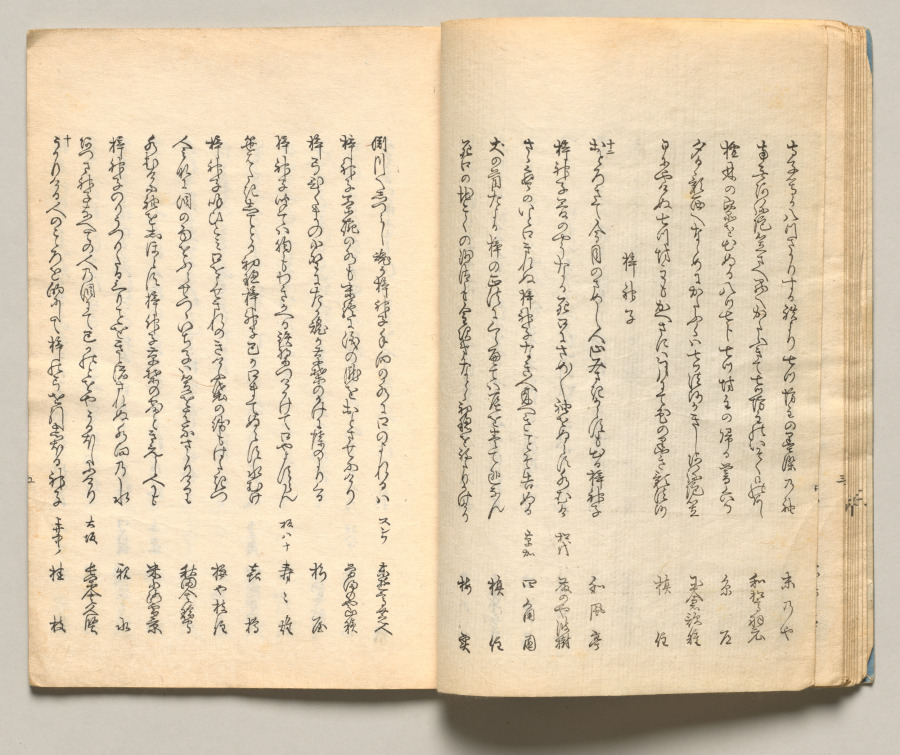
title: Spread Twelve from Volume Three of People of Japan in Light Verse (Kyōka)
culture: Japan, Edo period (1615–1868)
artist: Utagawa Hiroshige (Japanese, 1797–1858)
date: 1857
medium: Woodblock-printed book; ink and color on paper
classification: Bound Volume